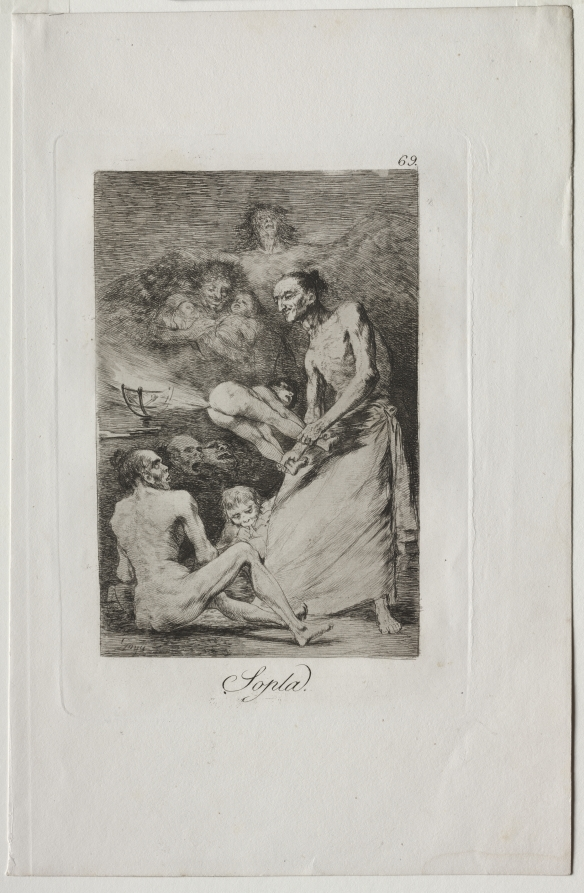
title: Blow, Plate 69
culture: Spain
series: Los Caprichos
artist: Francisco de Goya (Spanish, 1746–1828)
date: 1799 (printed c. 1855)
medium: etching and aquatint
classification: Print